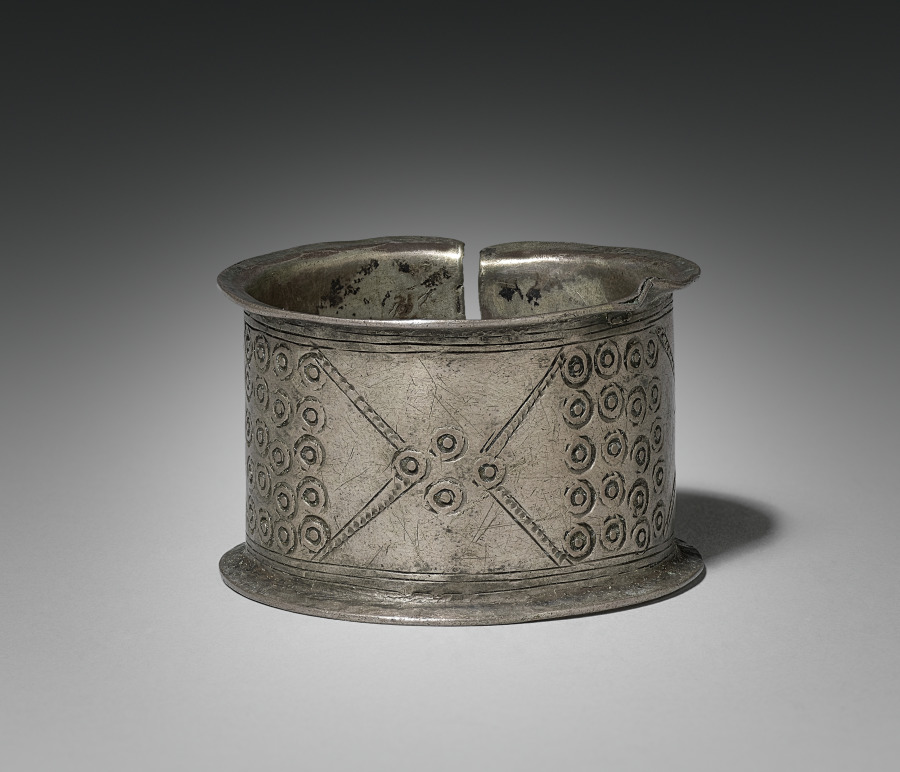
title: Bracelet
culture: India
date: 1800s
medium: silver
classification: Jewelry